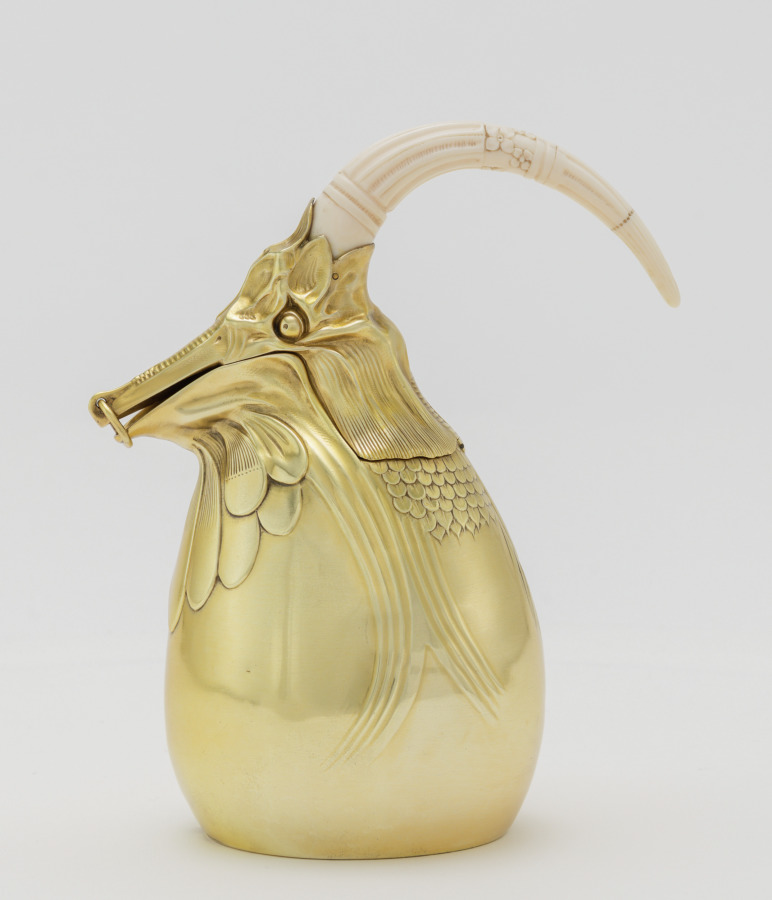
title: Coffee Pot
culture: France, Paris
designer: Carlo Bugatti (Italian, 1856–1940)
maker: Adrien-Aurélien Hebrard (French, 1866–1937)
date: c. 1907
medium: Gilt silver and ivory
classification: Silver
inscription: Made by A. A. Hebrard Firm, Paris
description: This tea and coffee service, salver, and table, together with some now missing cups, were all designed by Carlo Bugatti as an ensemble and presented at the 1902 exposition devoted to decorative arts in Turin, Italy. The set was probably acquired from Bugatti's 1907 exhibition at the Galerie Hébrard in Paris by a wealthy South African widow, Anna Blake, who was living there at the time. Some of the animal and insect motifs suggest mythical beasts or the fossils of prehistoric animals. When Mrs. Blake returned to Cape Town, she took these and other pieces designed by Bugatti with her, and they remained in South Africa throughout her lifetime.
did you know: This coffee pot is part of a larger tea and coffee service designed by Carlo Bugatti.